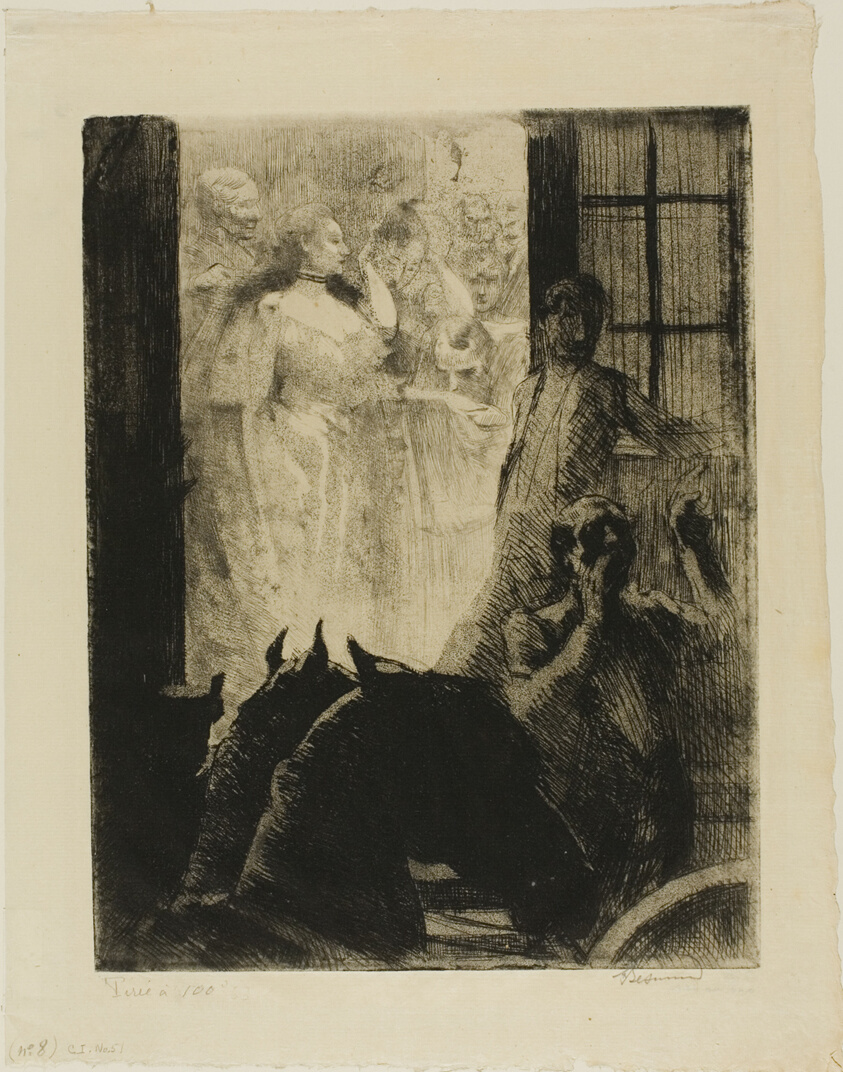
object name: Print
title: Social Success, plate seven from Woman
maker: Albert Besnard (French, 1849-1934)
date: c. 1886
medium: Etching, aquatint and drypoint on cream Japanese paper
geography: France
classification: etching; print; prints and drawing